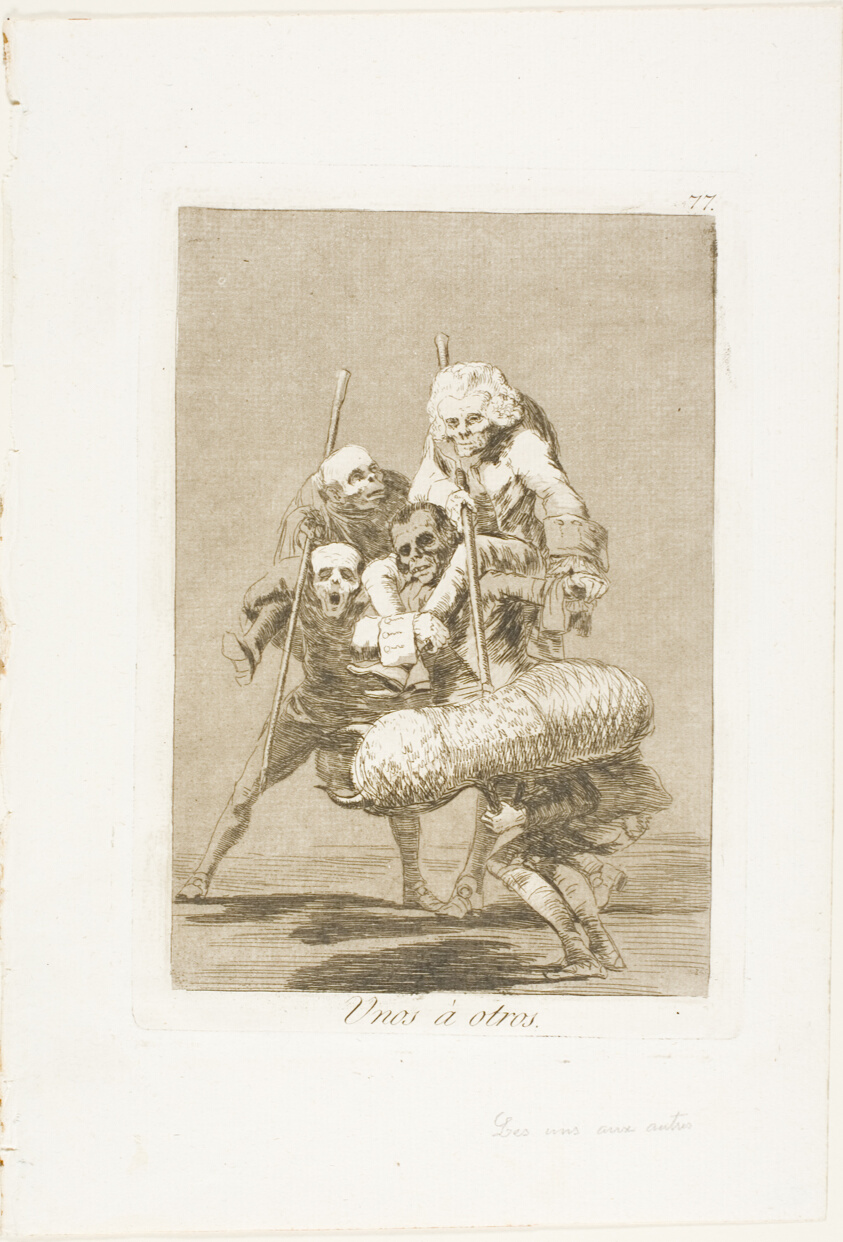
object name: Print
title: What One Does to Another, plate 77 from Los Caprichos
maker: Francisco José de Goya y Lucientes (Spanish, 1746-1828)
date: 1797/99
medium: Etching and aquatint on ivory laid paper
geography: Spain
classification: etching; print; prints and drawing